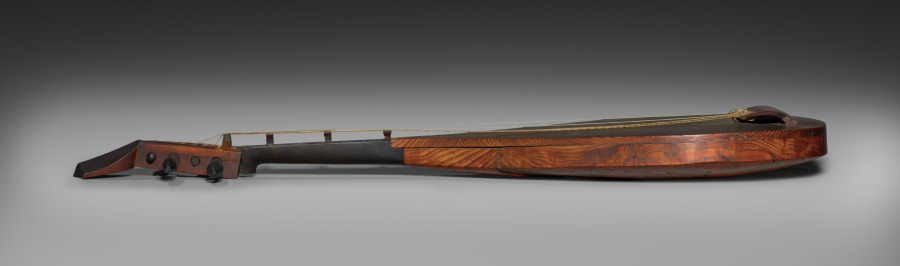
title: Heike Biwa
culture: Japan, Meiji period (1868–1912)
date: c. 1850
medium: Wood, bone, silk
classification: Musical Instrument